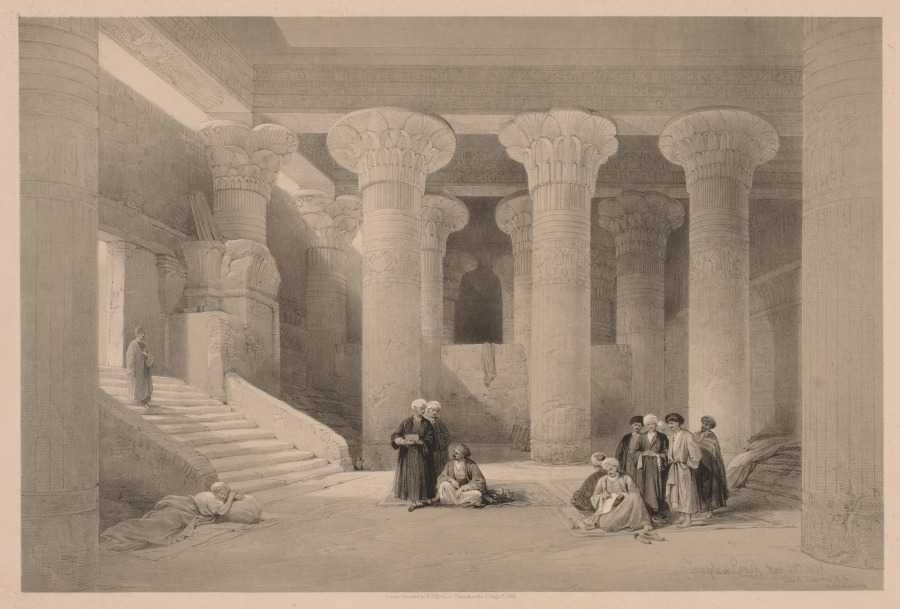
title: Egypt and Nubia: Volume I - No. 24, Temple at Esneh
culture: England, 19th century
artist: Louis Haghe (British, 1806–1885)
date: 1838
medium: color lithograph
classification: Print